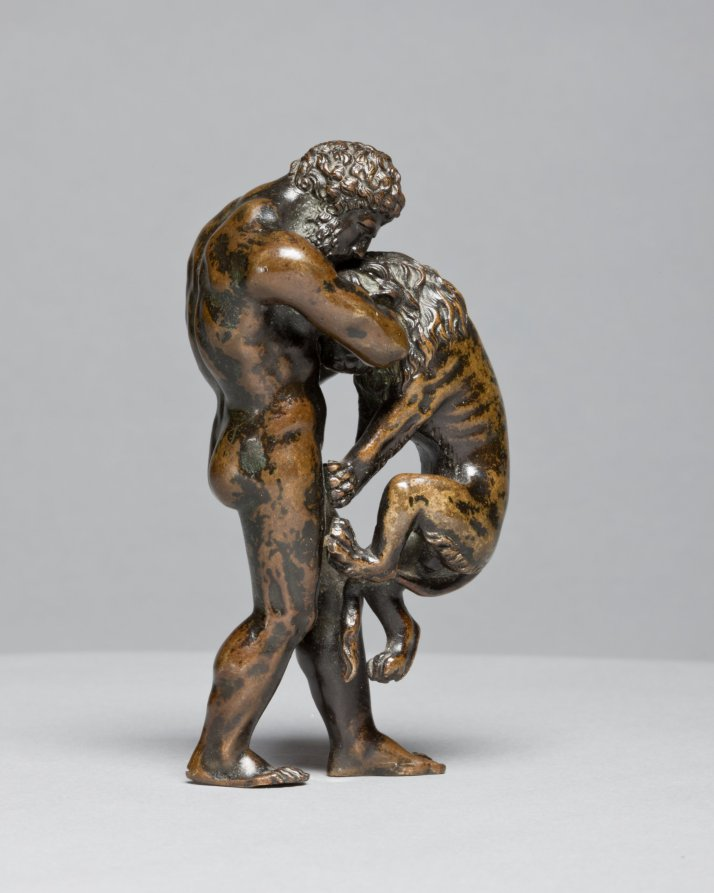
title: Hercules and the Nemean Lion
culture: Italy or France, 16th century or later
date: 1500s or later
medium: bronze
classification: Sculpture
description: The original owner of this work would have understood that this scene referred to the entire story of Hercules, the demi-god who had to accomplish twelve labors. The lion is named after the city of Nemea, near Corinth, a monstrous beast sent by the goddess Hera to wreak havoc on the area. After killing the lion, Hercules wore his pelt, commonly seen in other representations of the hero.